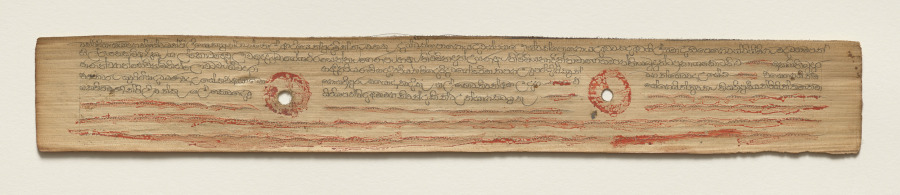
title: Leaf from a Buddhist Manuscript (verso)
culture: Sri Lanka, Singhalese, Late 17th century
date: c. 1700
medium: fiber paper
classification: Manuscript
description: Palm leaf material is still used for manuscripts in Sri Lanka. The palm leaves are prepared first by boiling them, drying them in the sun, and then rubbing them with oils. Scribes then use a metal stylus to incise the text. Then charcoal powder is wiped across the pages, filling in only the inscribed lines.